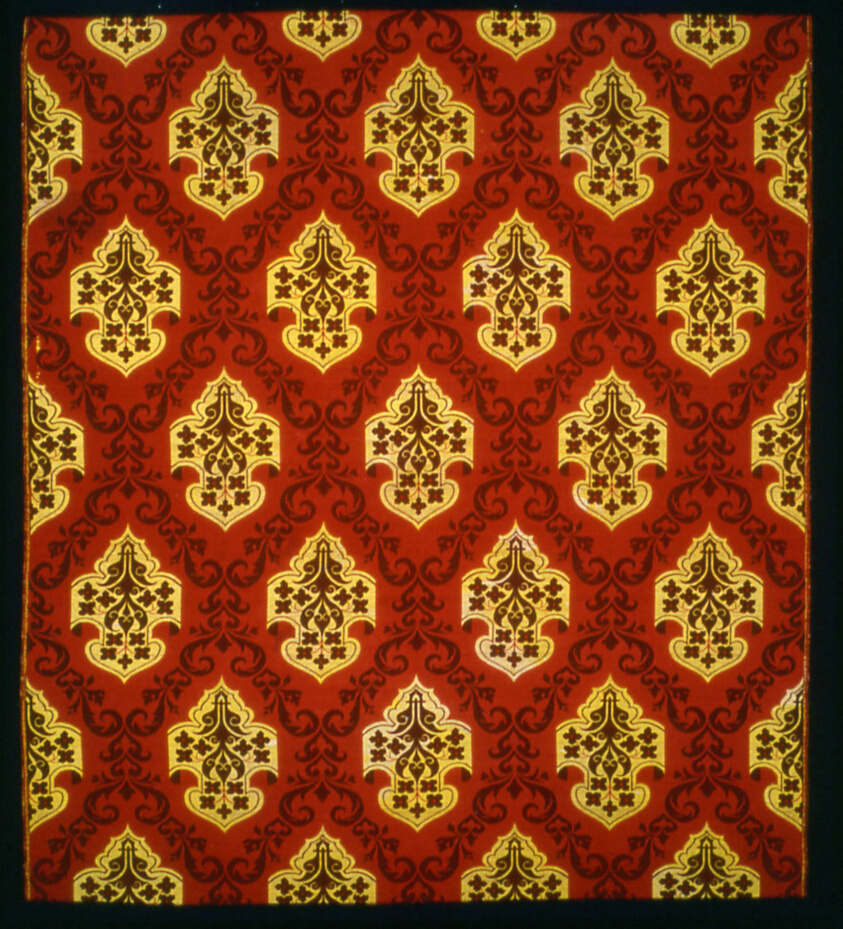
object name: Textile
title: Panel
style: Arts and Crafts Movement, british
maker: Produced by J. W. & C. Ward; England, Yorkshire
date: 1875/1900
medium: Wool and silk three-color complementary weft, weft-float faced 1:6 diamond twill weave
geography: England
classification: textile; weaving